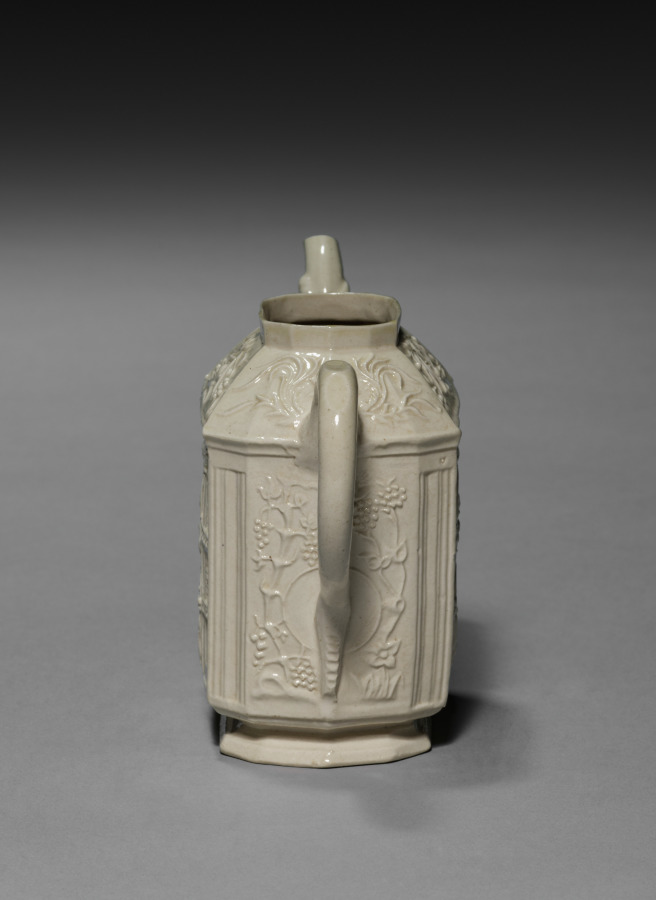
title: Teapot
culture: England, Staffordshire, 18th century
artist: Staffordshire Factory (British)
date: c. 1745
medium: salt-glaze earthenware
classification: Ceramic